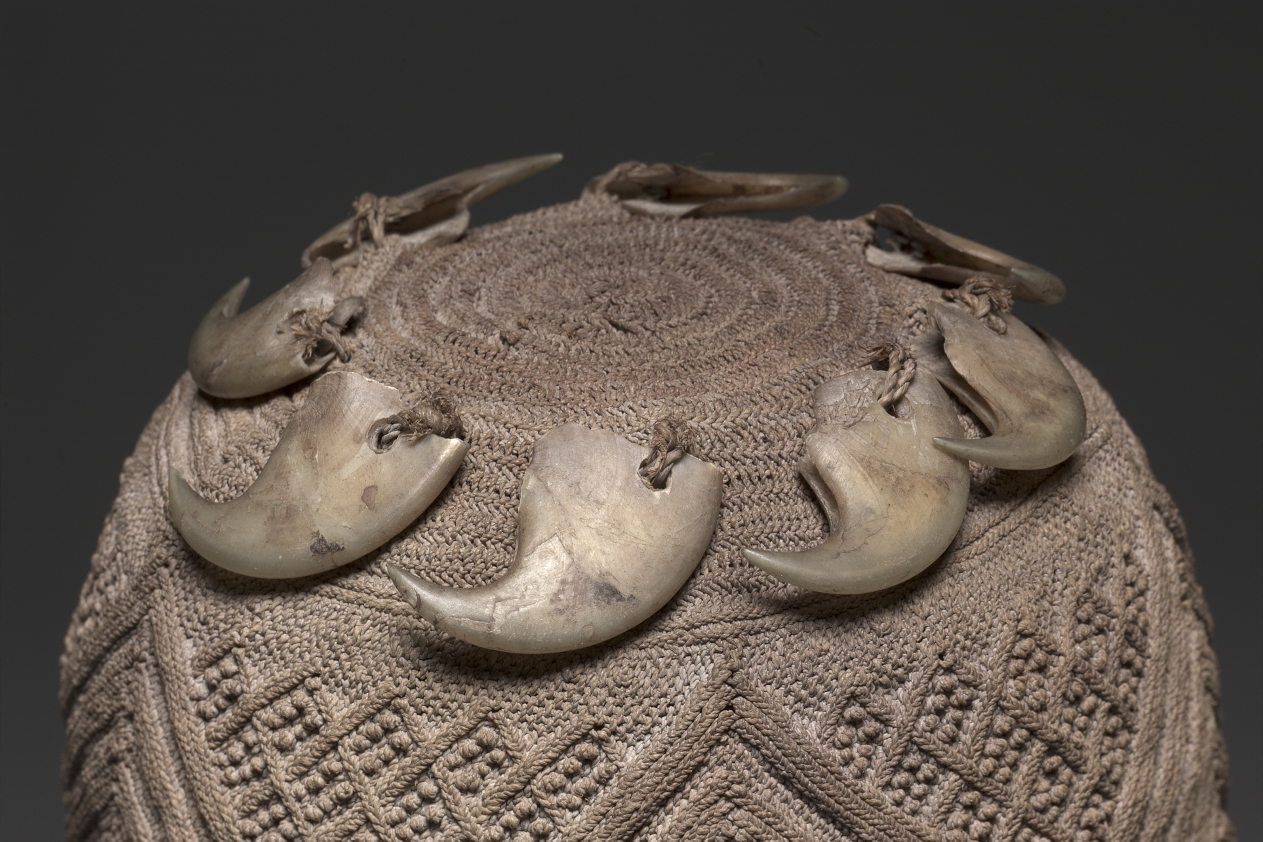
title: Prestige Cap (mpu ngola)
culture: Africa, Central Africa, Democratic Republic of Congo, Republic of Congo, or Cabinda (Angola), Kongo-style maker, possibly Yombe subgroup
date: late 1800s–early 1900s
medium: Raffia palm fiber (Raphia ruffia or R. vinifera) and leopard claws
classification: Garment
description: Zimpu (singular: mpu) are intricately knotted caps worn by men in parts of Central Africa. Ringed with leopard claws, this long cap (mpu ngola) once belonged to a high-status man; the fierce feline attachments alluded to his personal qualities, as both were seen as leaders in their domains. Its interlacing motifs appear across artforms made by the Kongo, Vili, and Yombe peoples. When new, caps draped over the head. However, raffia fibers stiffen over time. To support this now-delicate ngola, the CMA’s conservators mounted it upright. Known since at least 1607 in the former Loango Kingdom, as well as the adjacent Kongo Kingdom, such caps were once made by noblemen and worn into at least the 1980s.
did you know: The geometric motifs on this mpu cap—including diamonds and interlaces—are seen on Kongo, Vili, and Yombe works in other materials, including ivory and basketry.